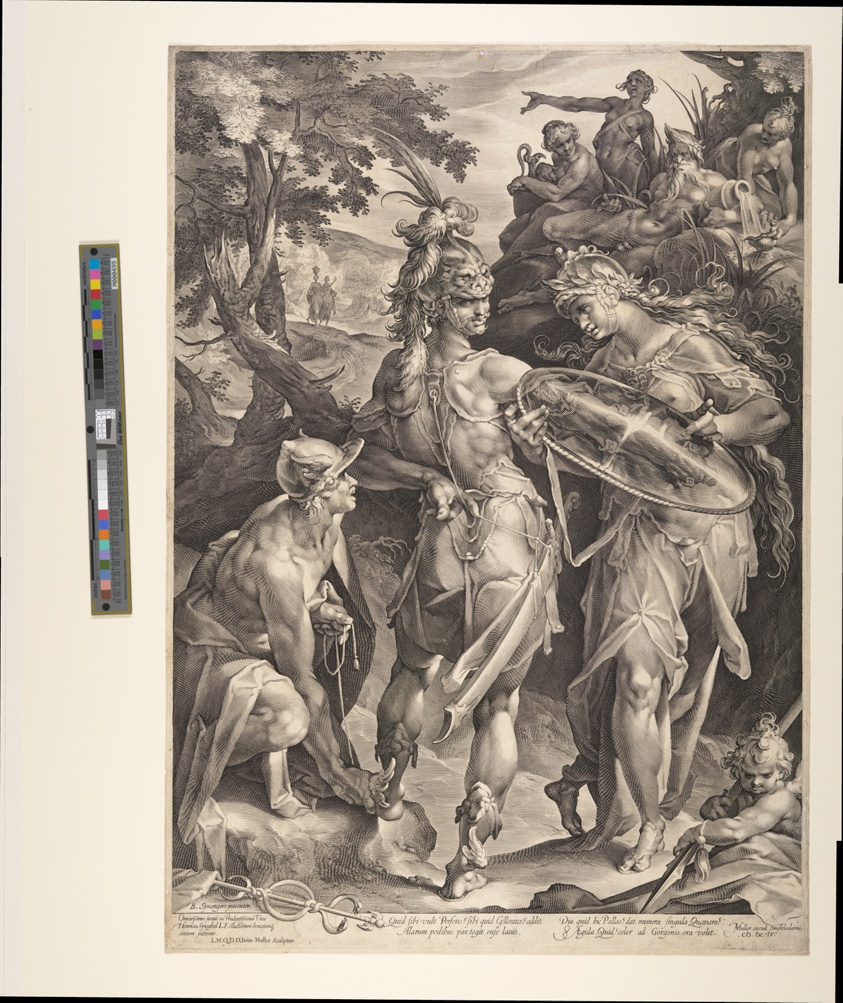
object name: Print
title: Minerva Arming Perseus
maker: Jan Harmensz Muller (Dutch, 1571–1628); Bartholomeus Spranger (Flemish, 1546–1611)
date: 1604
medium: Engraving on ivory laid paper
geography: Netherlands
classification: engraving; paper; print; prints and drawing